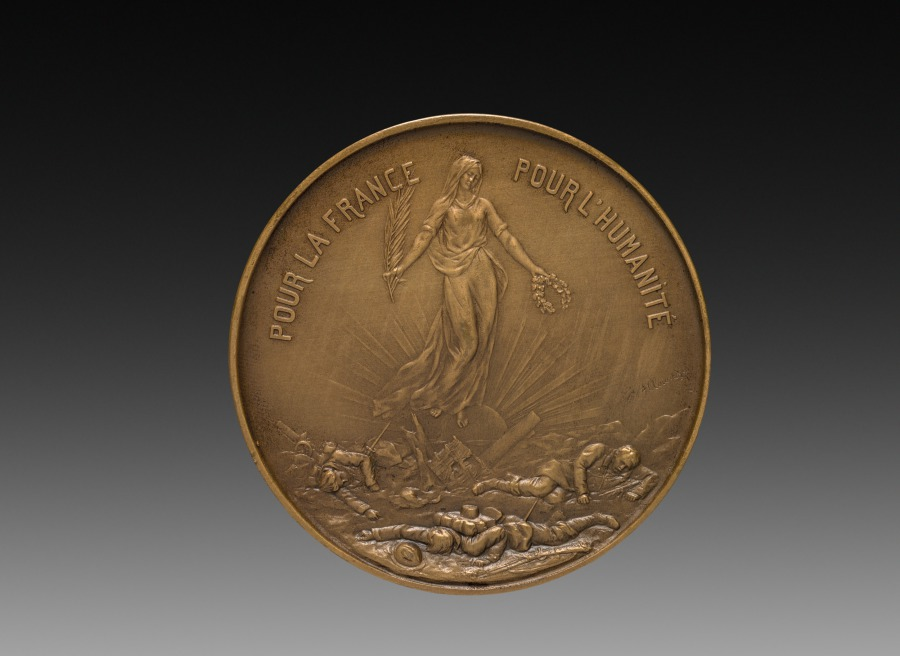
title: Medallion (obverse)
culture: France, 19th-20th century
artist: Henri Emile Allouard (French, 1844–1929)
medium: bronze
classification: Metalwork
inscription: "Aux héros inconnus. À la memoire de . . . pro patria."